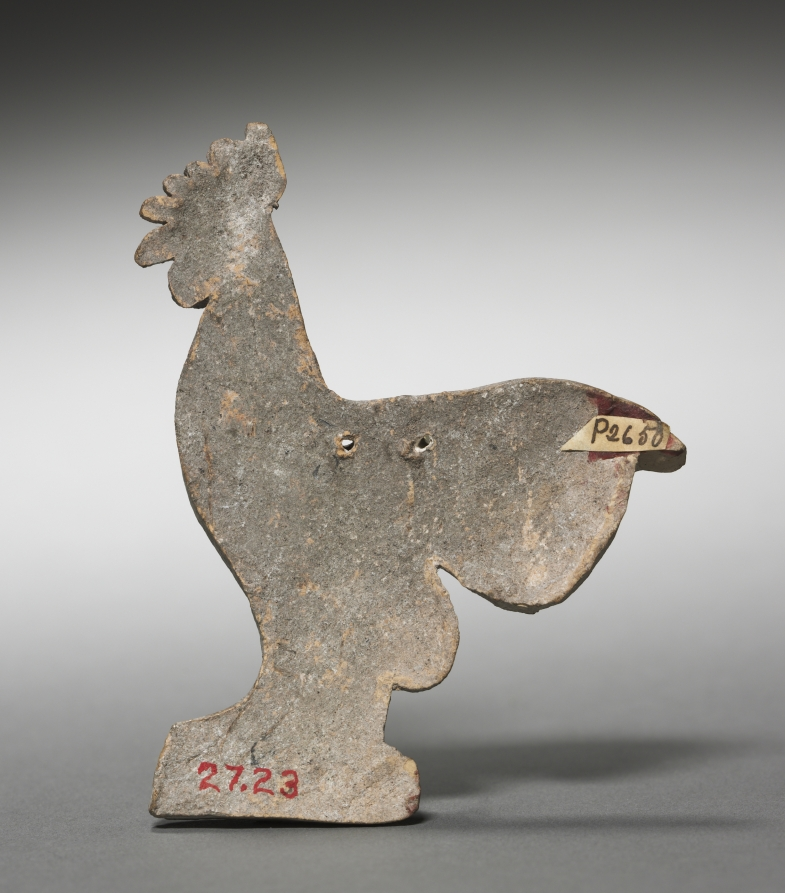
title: Cock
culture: Greece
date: 500s BCE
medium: terracotta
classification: Sculpture